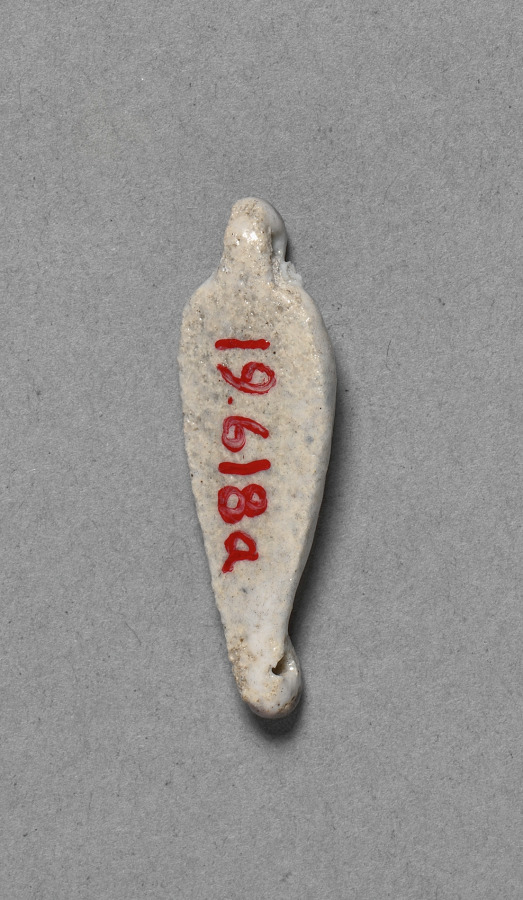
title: Petal-Shaped Bead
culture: Egypt, New Kingdom (1540–1069 BCE), Dynasty 18, reign of Amenhotep III (1390–1352 BCE)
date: c. 1391–1353 BCE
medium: faience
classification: Jewelry